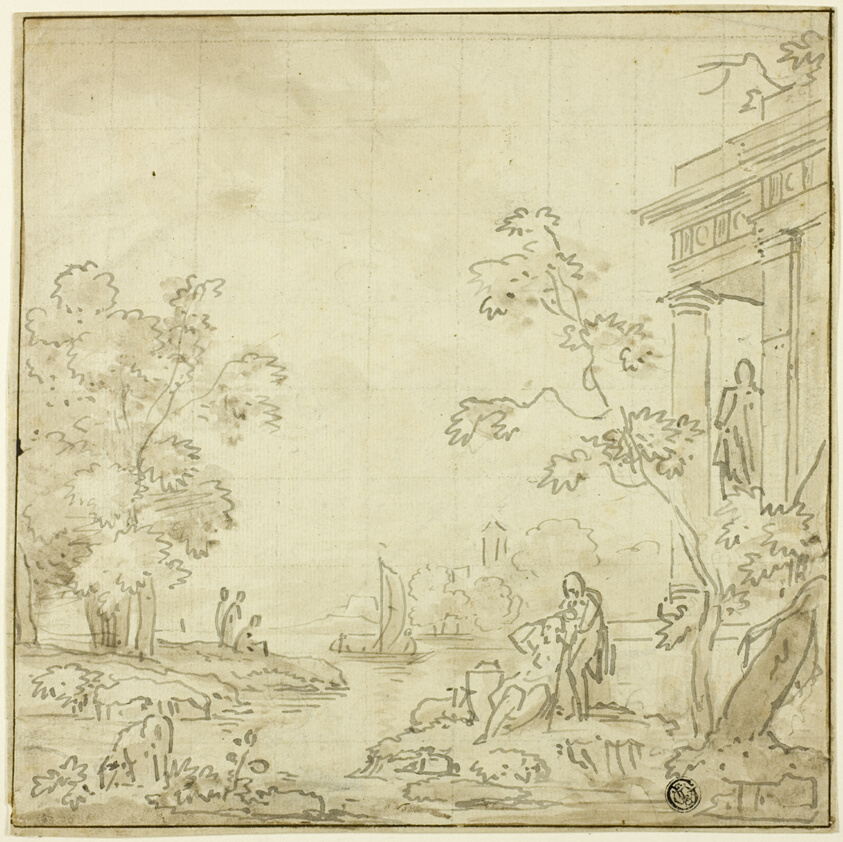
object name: Drawing and Watercolor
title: Harbor Scene with Figures, Temple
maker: George Smith of Chichester (English, 1714-1776)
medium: Pen and brown ink with brush and brown wash, over traces of graphite, squared in black chalk, on ivory laid paper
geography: Holland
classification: ink or chalk wash; drawings (visual works); prints and drawing